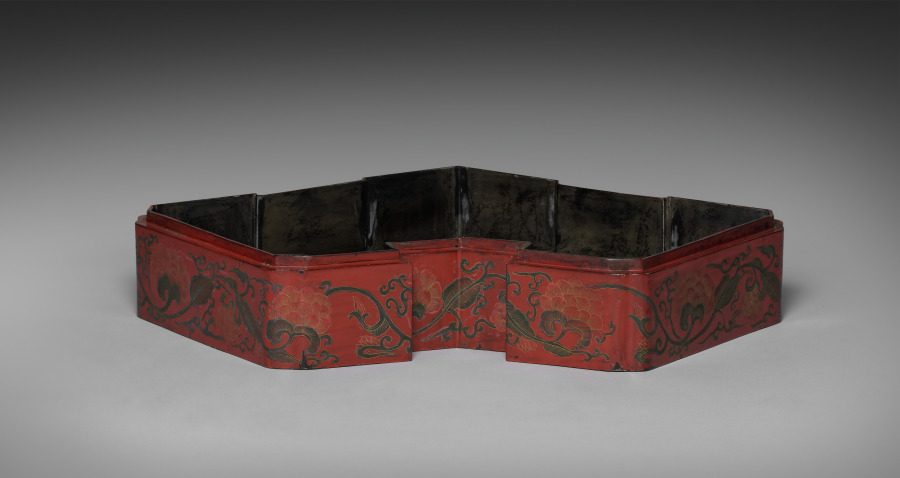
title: Middle Tier Box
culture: Japan, Edo period (1615–1868)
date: late 1700s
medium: red lacquer over a wood core, with litharge painting and engraved gold designs (Ryukyuan)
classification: Lacquer